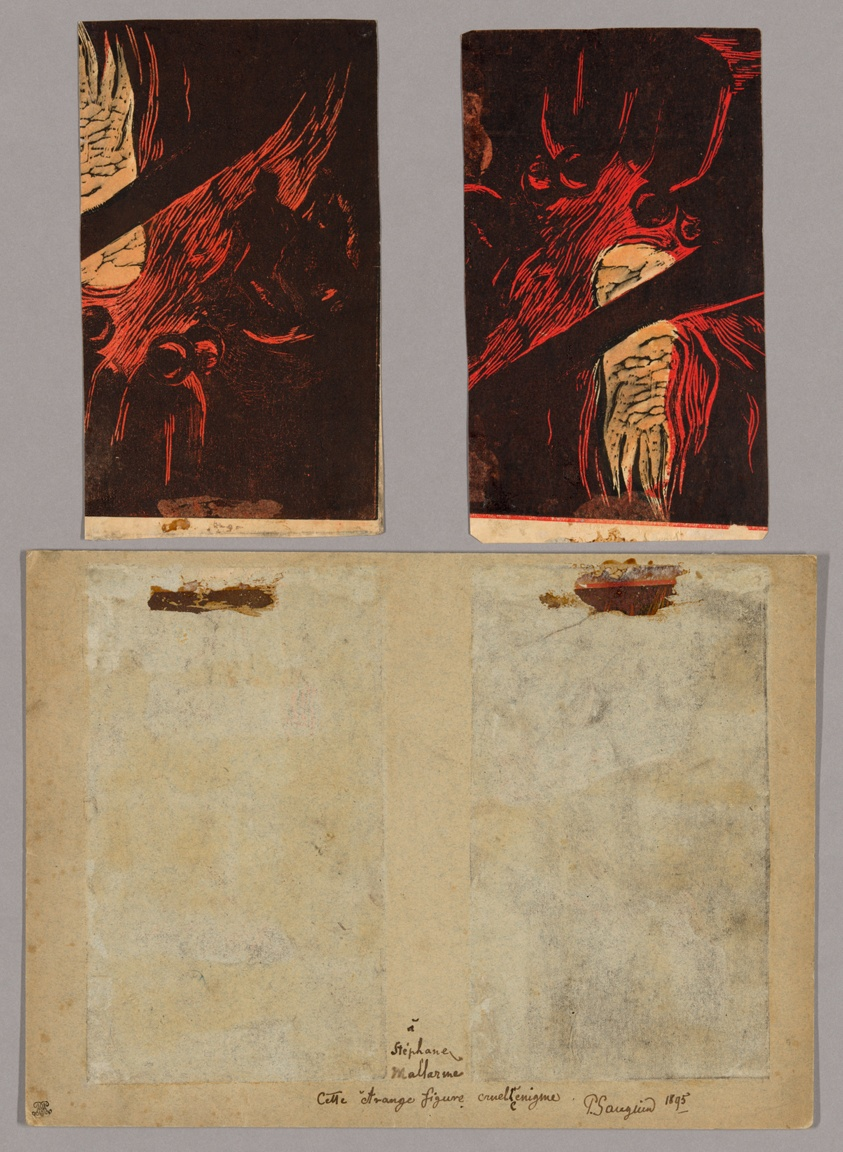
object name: Print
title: Oviri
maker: Paul Gauguin (French, 1848-1903)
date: 1894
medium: Wood-block print, printed twice in deep-yellow ocher and black ink, on cream wove paper (an imitation Japanese vellum), mounted on mottled blue wove laminate card (recto); wood-block print in black ink over red ink tone block, and brush and solvent-thinned orange wash, on cream wove paper (an imitation Japanese vellum) mounted on mottled blue wove laminate card (verso)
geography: France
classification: woodcut; print; prints and drawing